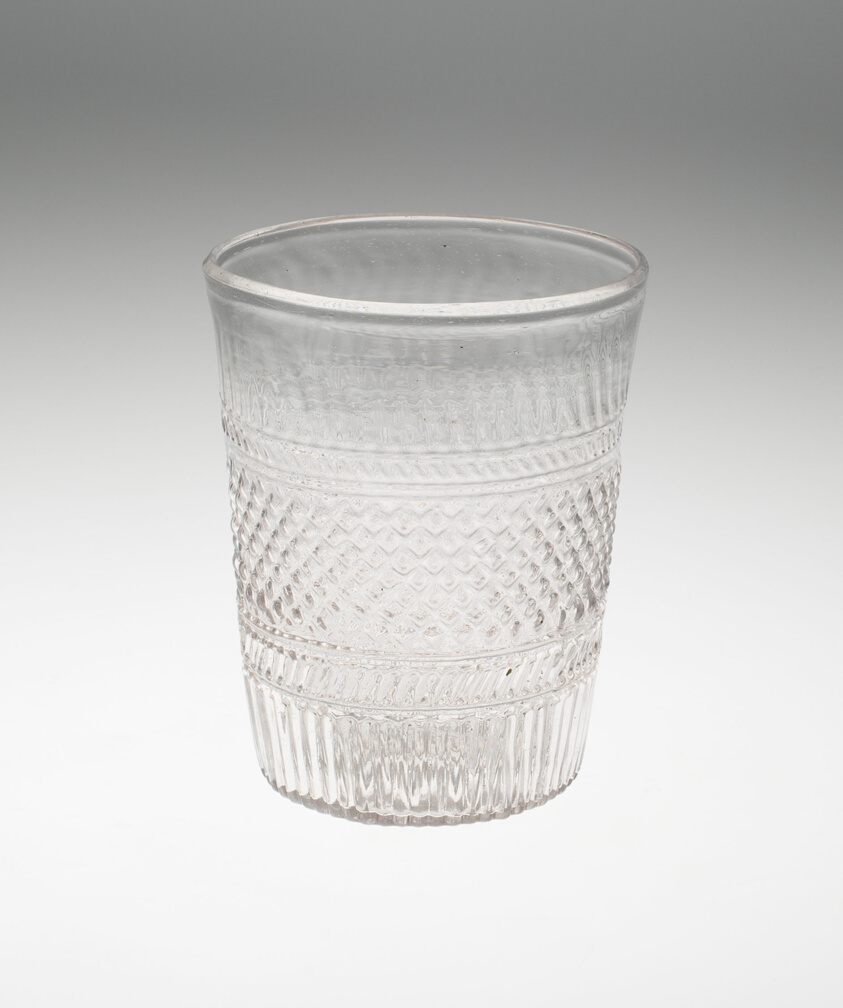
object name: Glass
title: Beaker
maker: Netherlands or Germany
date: 18th century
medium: Glass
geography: Netherlands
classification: glass; european decorative arts